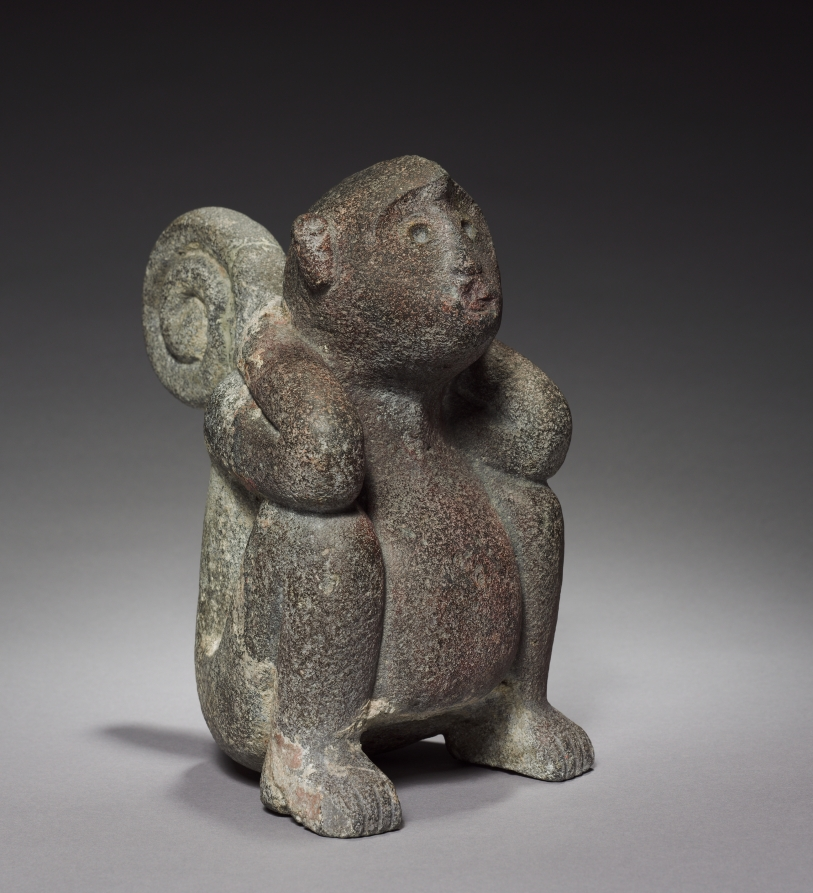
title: Monkey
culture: Central Mexico, Tacuba, Aztec, Post-Classic Period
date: 1325–1519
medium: stone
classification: Stone